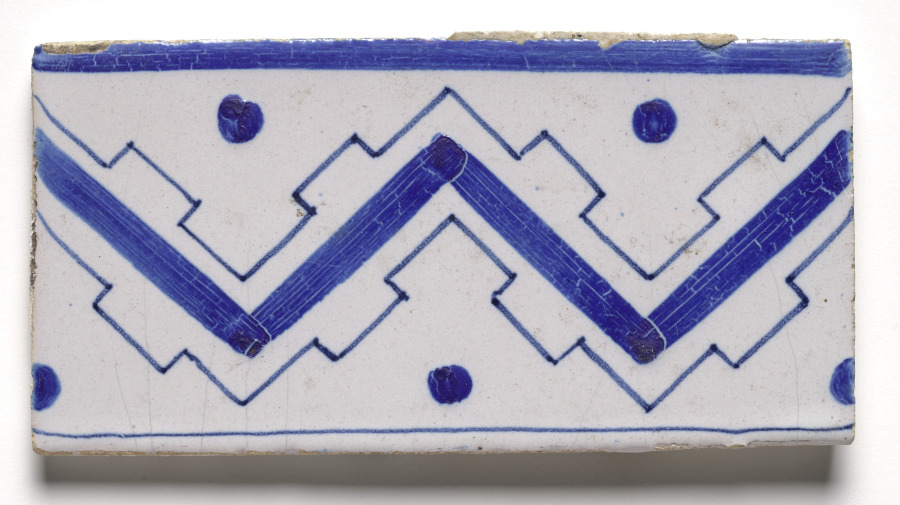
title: Tile–Border Tile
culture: Netherlands, Holland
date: c. 1888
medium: glazed ceramic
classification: Ceramic